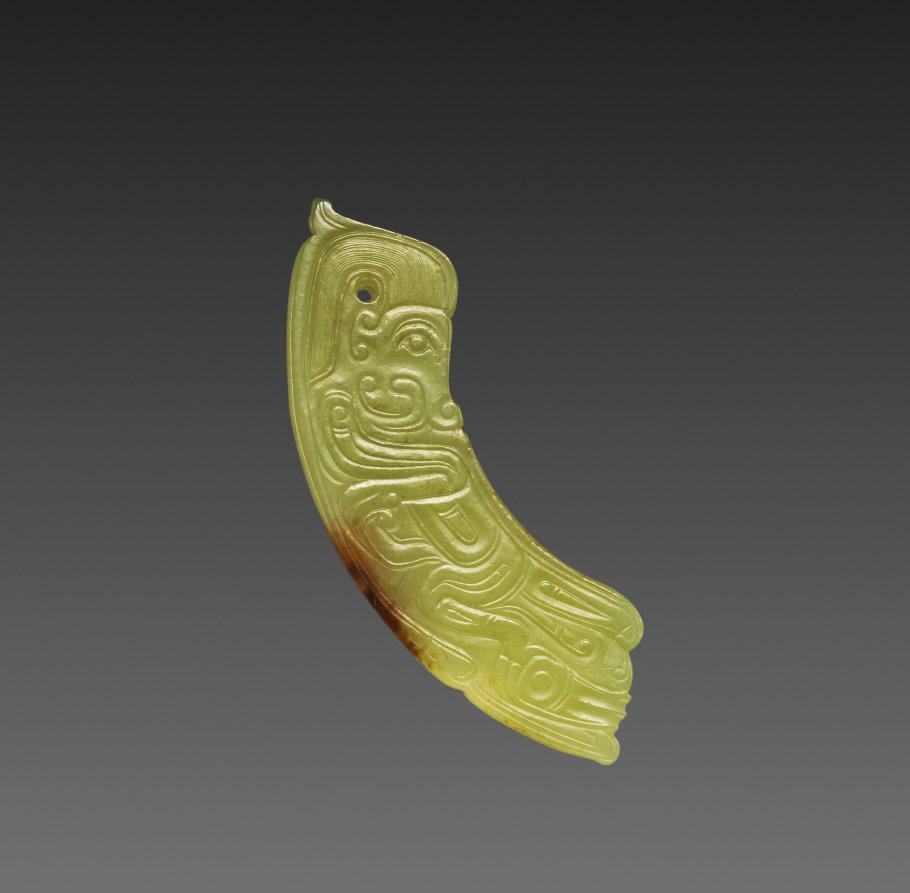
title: Arc Pendant with Human-like Figure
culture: China, Western Zhou dynasty (c. 1046–771 BCE)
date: c. 1050–771 BCE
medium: nephrite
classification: Jade